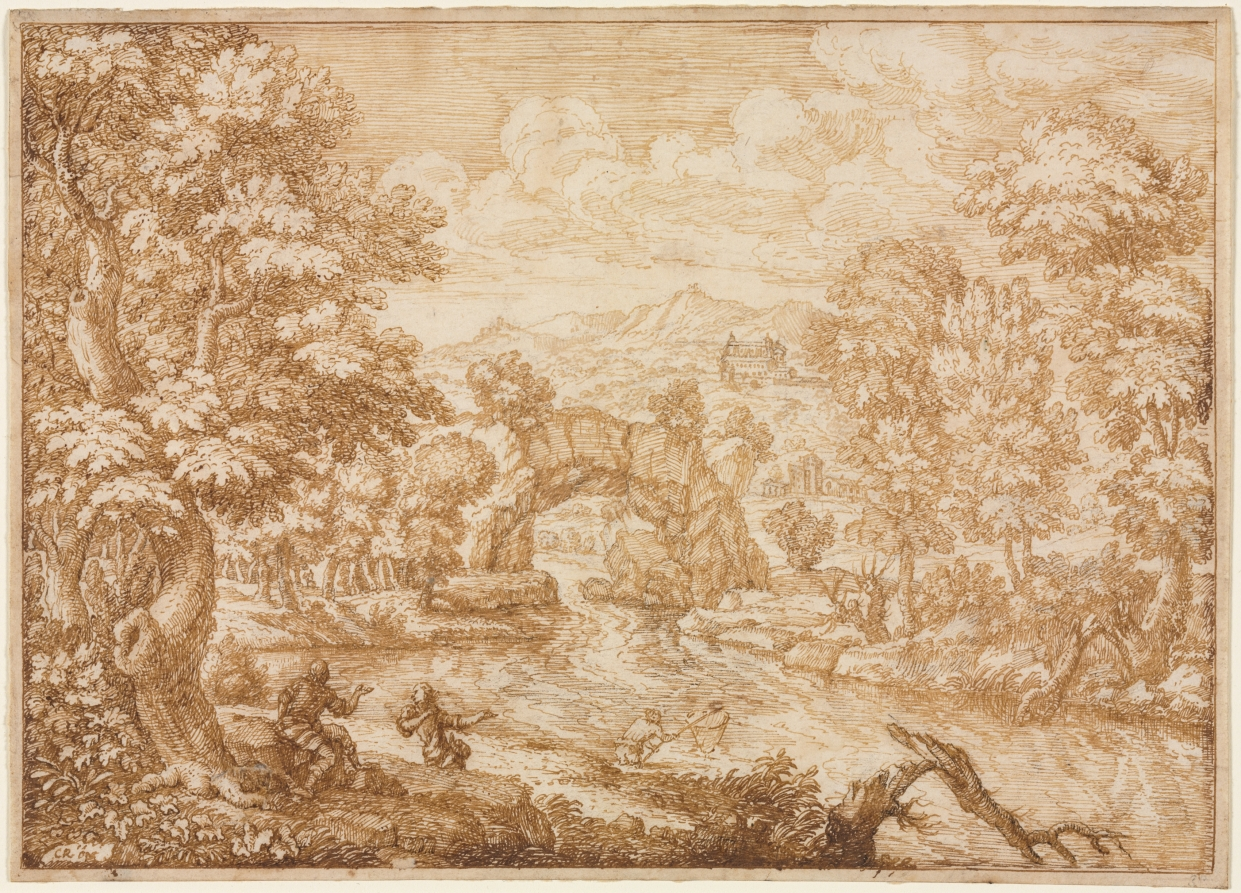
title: River Landscape with Arched Rock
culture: Italy, 17th century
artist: Crescenzio di Onofrio (Italian, 1632?–after 1712)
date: second half 1600s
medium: pen and brown ink over black chalk; framing lines in brown ink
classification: Drawing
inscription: signed, lower left, in brown ink: CR. O[N?] [N is underlined] ; lower right, in black chalk: [323?] [last two numbers in superscript]